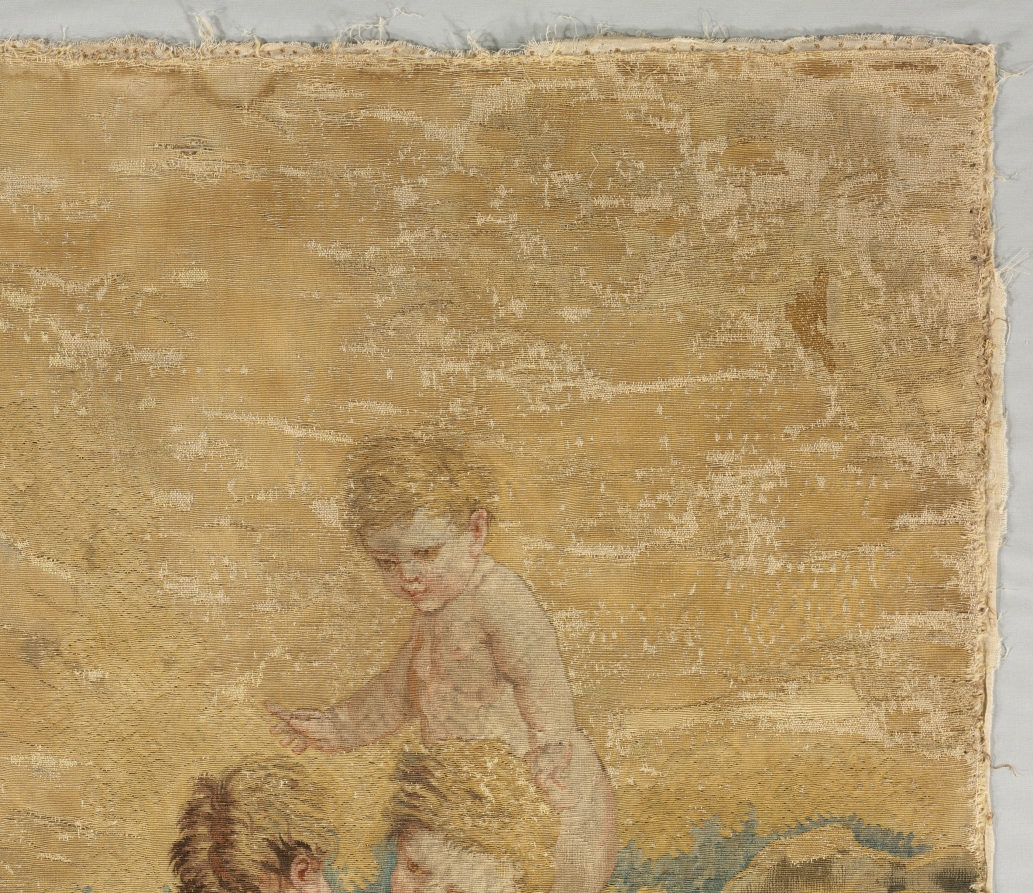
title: Children Playing: The Bath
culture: France, Beauvais, 18th century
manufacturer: workshop of Charron (French)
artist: after a design by François Boucher (French, 1703–1770)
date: 1700s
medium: tapestry weave: silk and wool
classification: Tapestry